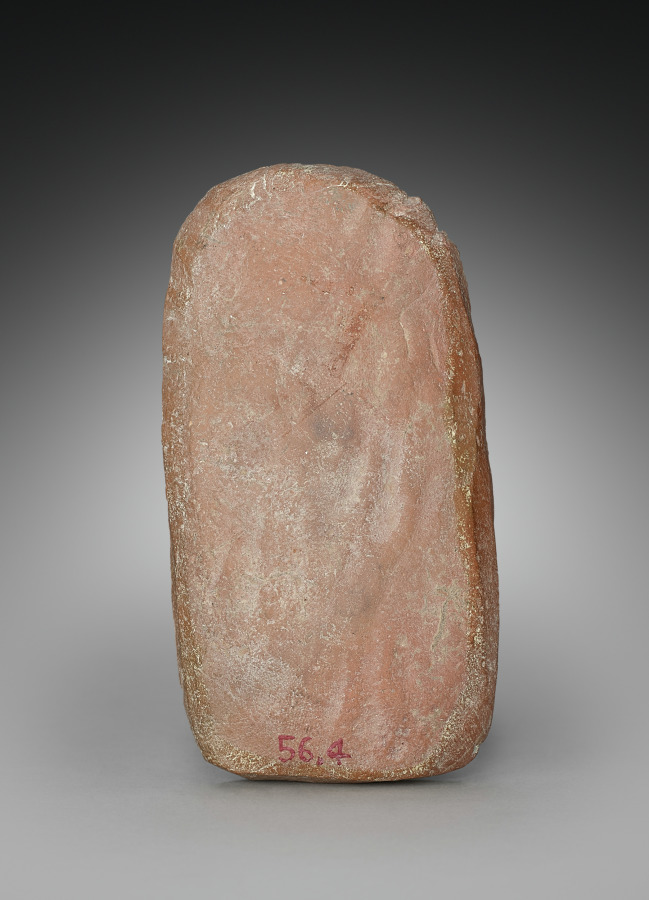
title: Mould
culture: India, Kashmir, 8th-9th Century (?)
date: 700s-800s(?)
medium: terracotta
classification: Ceramic